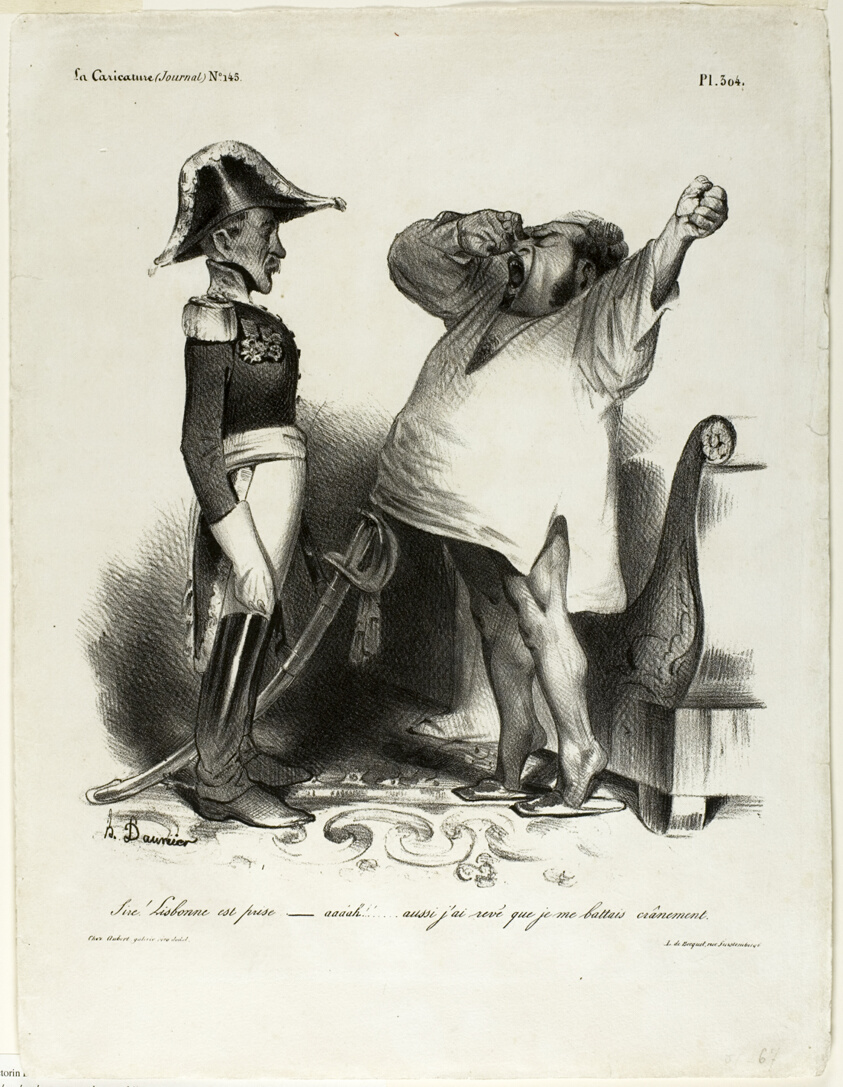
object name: Print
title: “- Sire! Lisbon has been captured. - aaaah!!... and I dreamt that I had fought courageously!,” plate 304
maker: Honoré Victorin Daumier; French, 1808-1879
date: 1833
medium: Lithograph in black on white wove paper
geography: France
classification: lithograph; print; prints and drawing